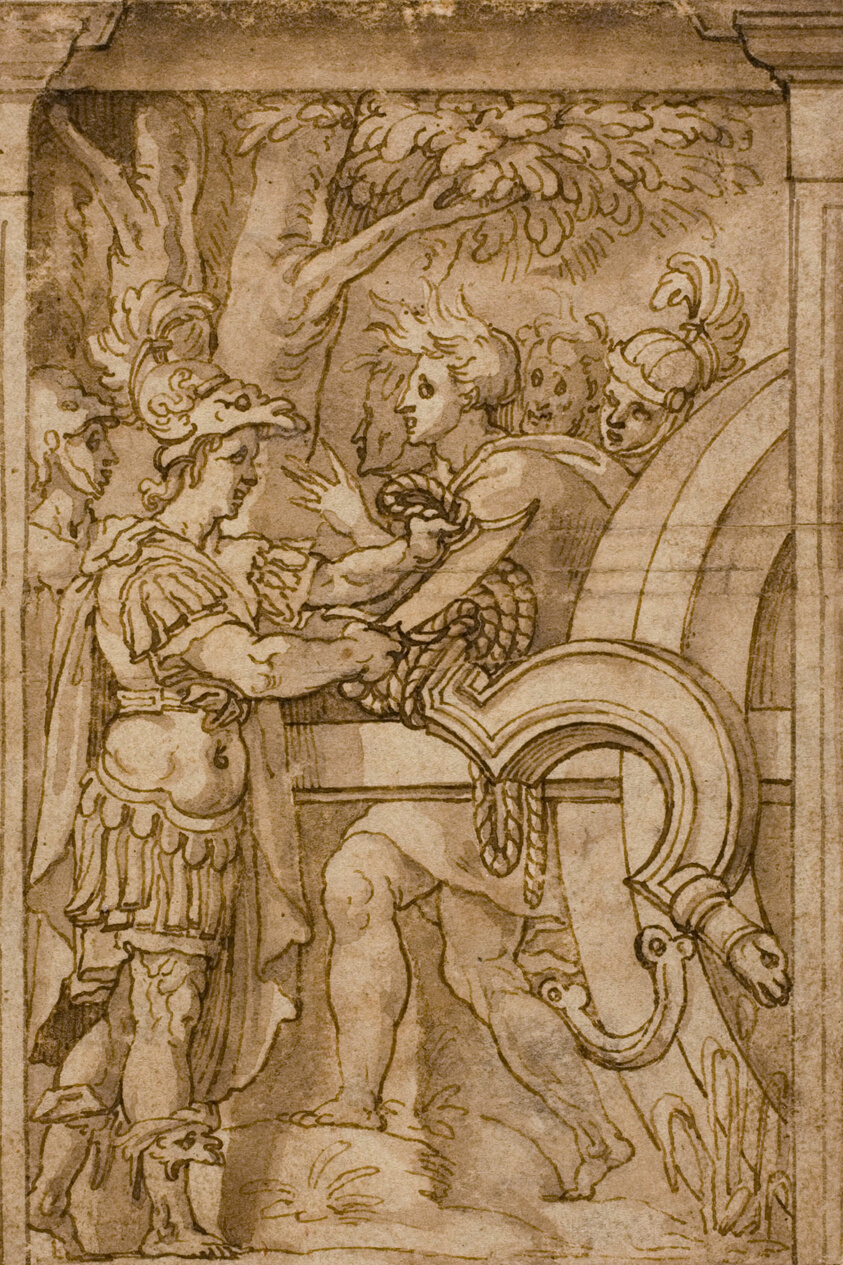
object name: Drawing and Watercolor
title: Alexander Cutting the Gordian Knot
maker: After Maturino da Firenze (Italian, 1490-1527/1528); after Polidoro Caldara, called Polidoro da Caravaggio (Italian, c. 1499-c. 1543)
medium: Pen and brown ink, with brush and brown wash, on cream laid paper, laid down on ivory laid paper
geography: Italy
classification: ink with wash; drawings (visual works); prints and drawing